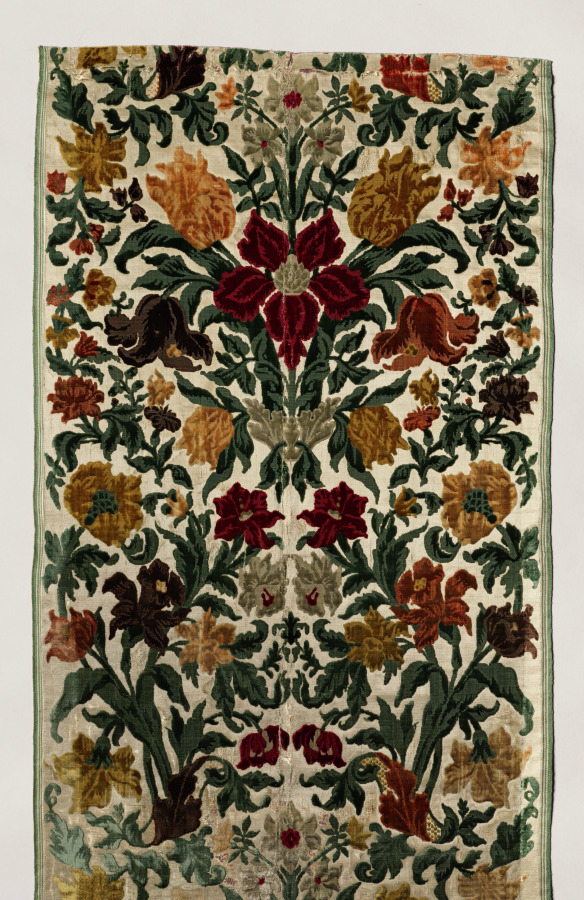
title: Length of Floral Velvet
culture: Italy, Genoa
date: 1600s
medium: velvet (cut, uncut, voided); silk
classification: Velvet